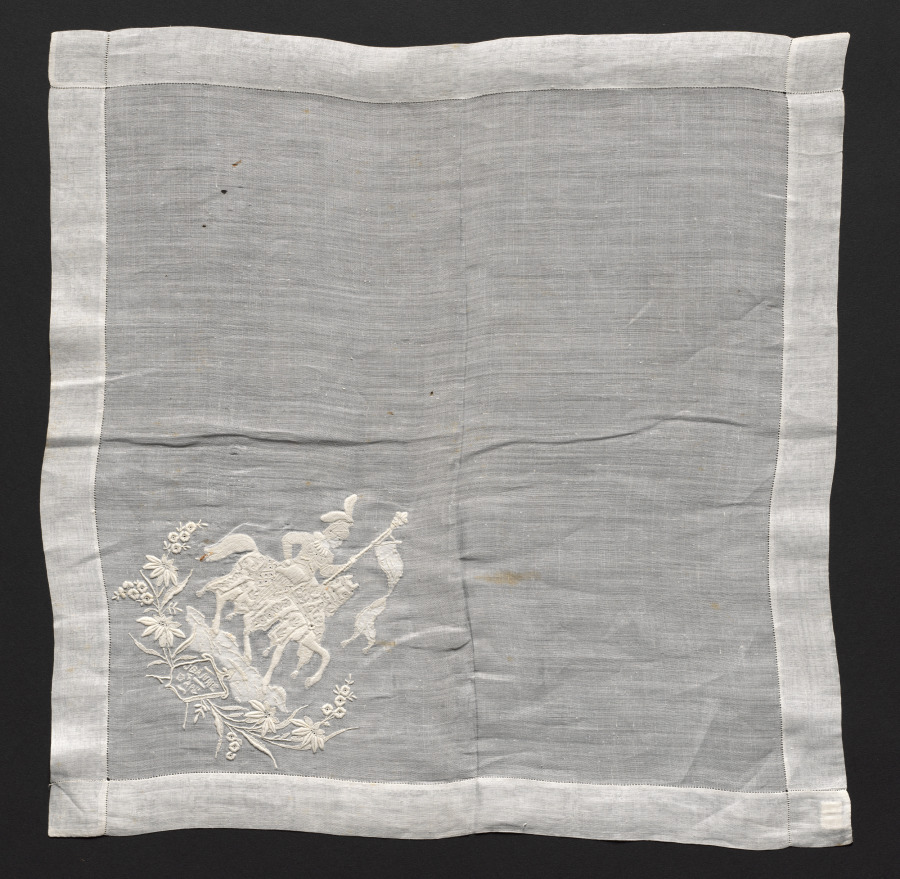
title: Embroidered Handkerchief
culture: Switzerland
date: 1800s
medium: linen: embroidery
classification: Embroidery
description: This handkerchief is embroidered with the figure of Joan of Arc on horseback in one corner.